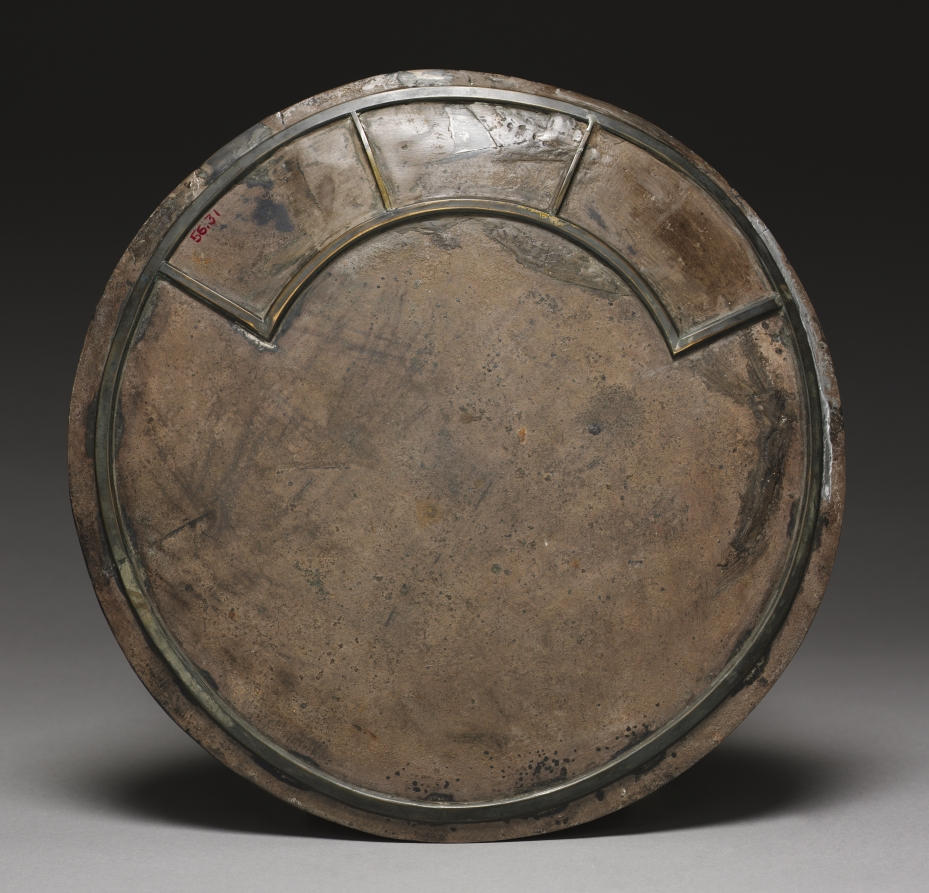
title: Mirror with a Handle in the Form of a Herakles Knot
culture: Byzantium, Syria(?), Byzantine period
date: c. 280–400 CE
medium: silver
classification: Metalwork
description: This type of mirror was introduced throughout the Roman Empire by the 2nd century and remained popular into the 3rd and 4th centuries. Similar examples have been found in Germany and Britain. The handle is made of two thick pieces of silver wire, intertwined to form a Herakles knot--a knot so complex that only someone as strong as Herakles could break it. In antiquity, knots of various kinds were believed to provide protection from harm.